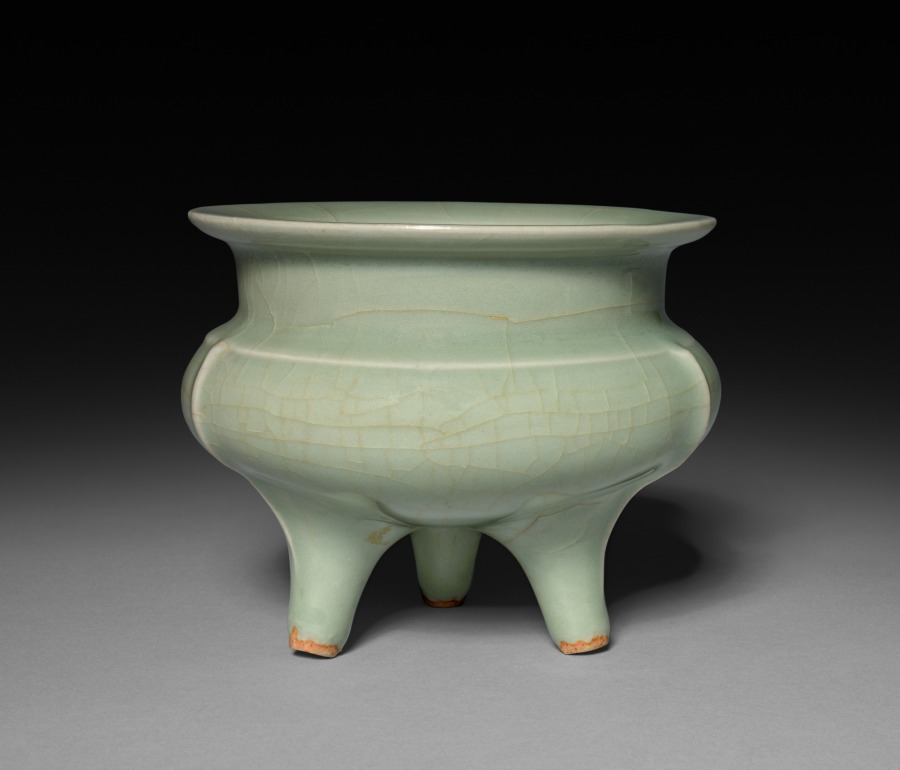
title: Incense Burner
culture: China, Southern Song dynasty (1127-1279)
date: 960–1279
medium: glazed porcelain, Longquan ware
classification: Ceramic